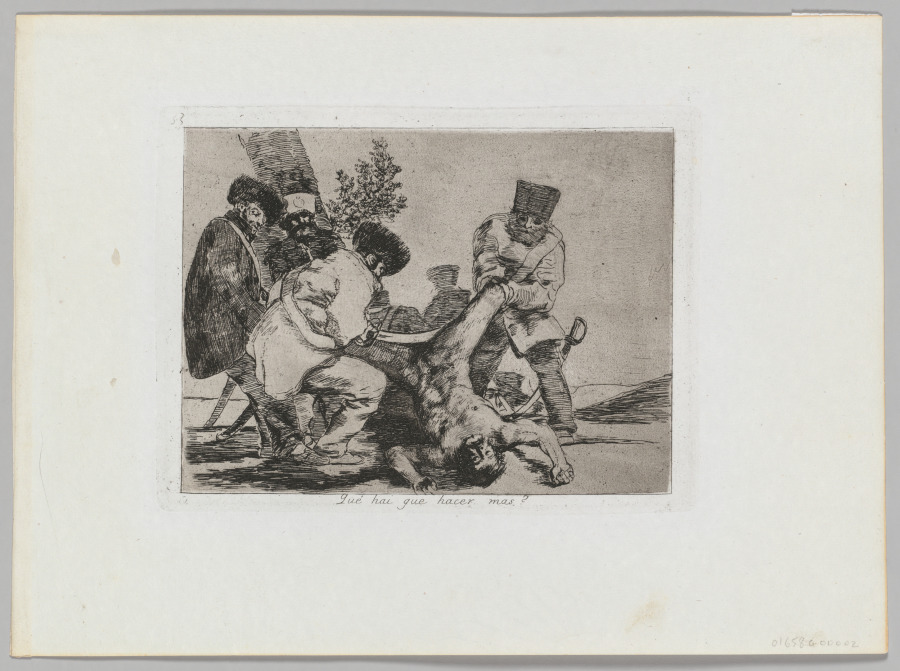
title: Disasters of War: Pl. 33, What more can one do?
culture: Spain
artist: Francisco de Goya (Spanish, 1746–1828)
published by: Real Academia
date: 1810–1813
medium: Etching and aquatint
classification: Print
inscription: Lower right, in graphite: 01658G00002; In plate, below image, center: Qué hai gue hacer mas?.; in plate, above image, upper left: 33; verso: lower right corner, in graphite: G-54 (upside down)